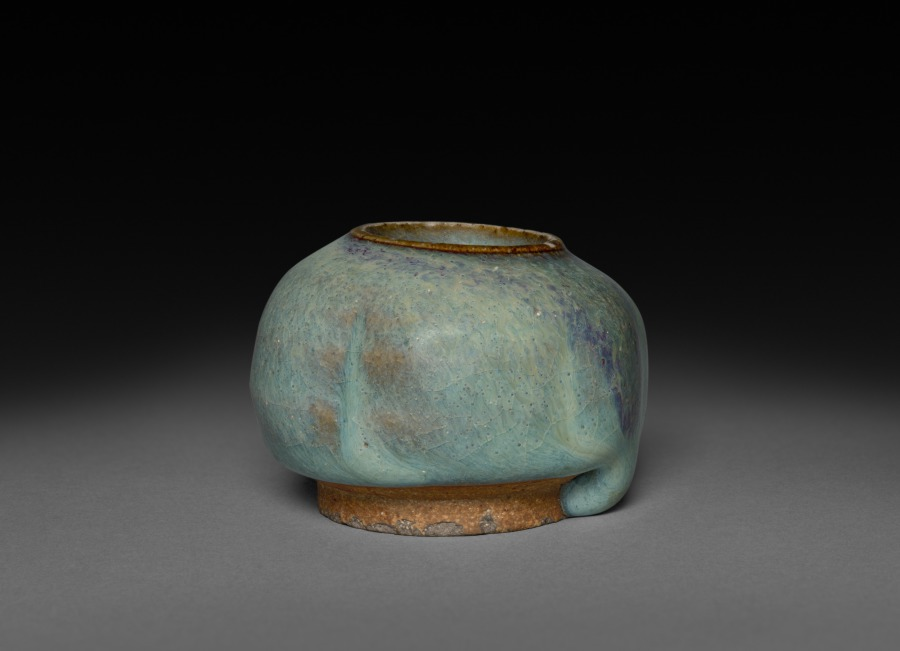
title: Small Lobed Jar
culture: Northern China, Jin dynasty (1115-1234) - Yuan dynasty (1271-1368)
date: 1115–1368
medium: glazed buff stoneware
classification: Ceramic